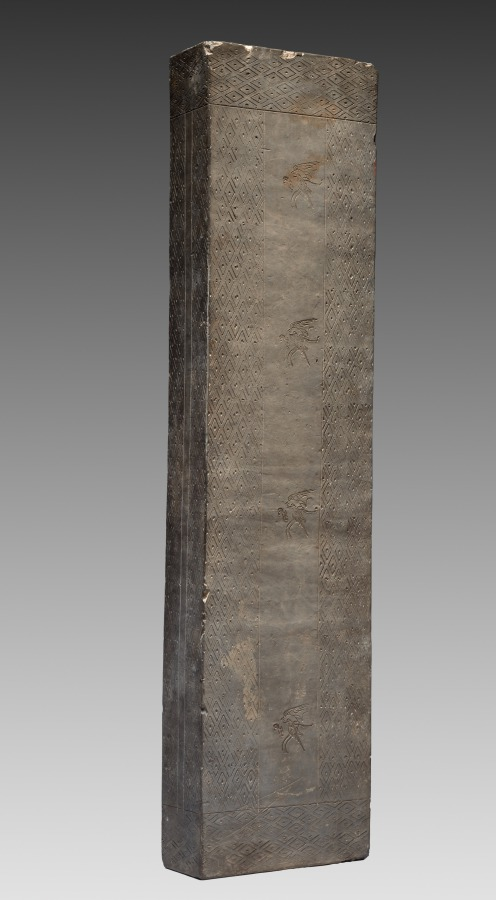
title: Tomb Tile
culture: China, Henan province, Jincun, Eastern Zhou dynasty (770–256 BCE)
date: 771–256 BCE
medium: earthenware with stamped decoration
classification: Ceramic